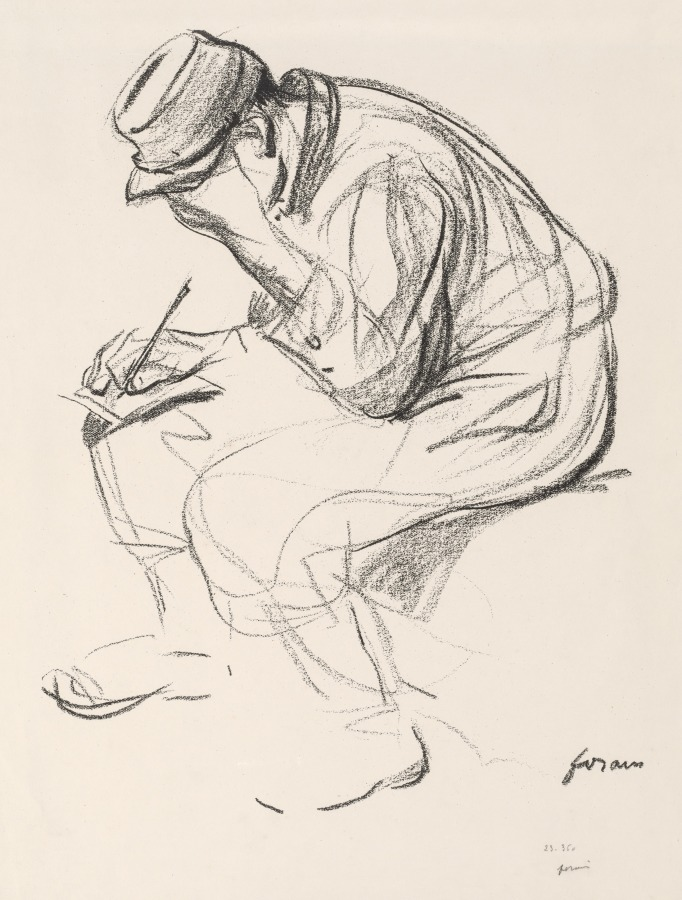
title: Prisoner of War Writing a Letter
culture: France, 20th century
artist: Jean Louis Forain (French, 1852–1931)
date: 1910s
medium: lithograph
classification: Print